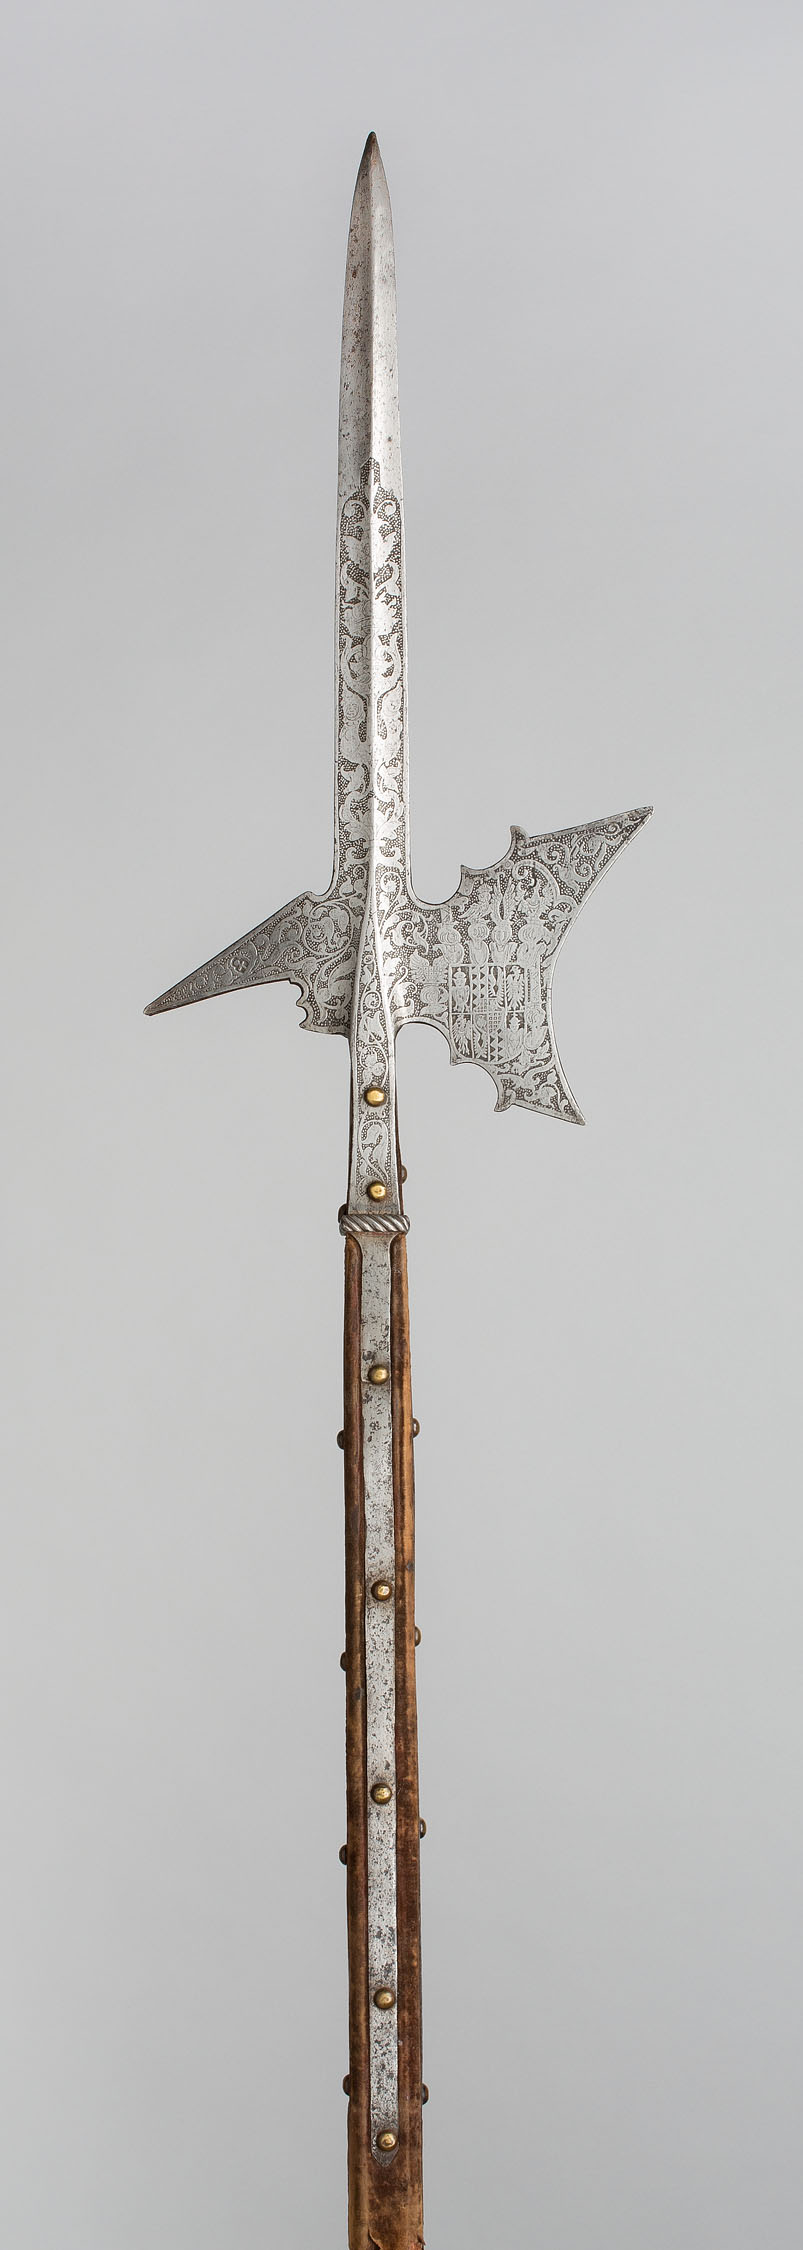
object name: Arms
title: Halberd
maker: German (Saxony)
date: 1500/1600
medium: Steel, wood, and velvet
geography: Saxony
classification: edged weapon-staff; arms; arms and armor